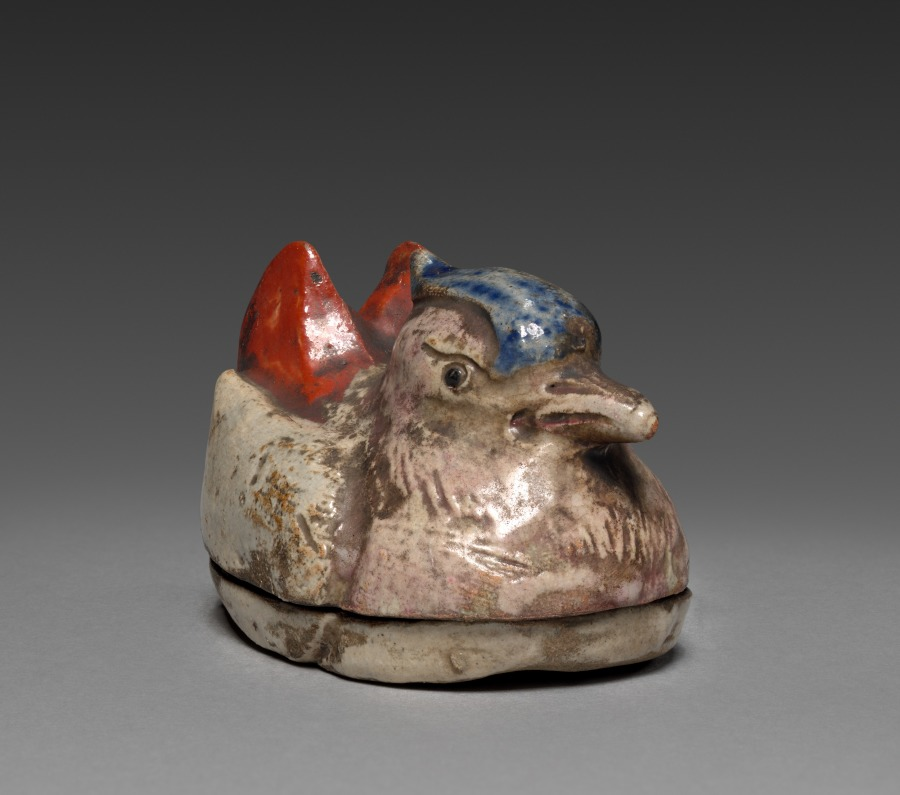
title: Incense Container (Kōgō) in the Shape of a Mandarin Duck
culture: Japan, Edo period (1615–1868)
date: c. 1700–1868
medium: Stoneware with glaze and incised decoration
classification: Ceramic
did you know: The artist incised the bird's feet on the bottom of the box.